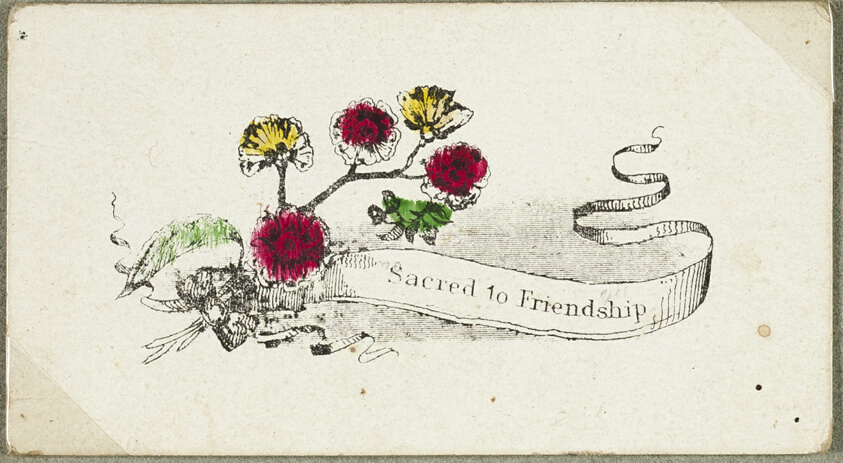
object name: Print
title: Sacred to Friendship (valentine)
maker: Unknown Artist; American or English, 19th century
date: c. 1830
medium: Engraving with hand-coloring on ivory card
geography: United States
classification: valentine; prints and drawing; print